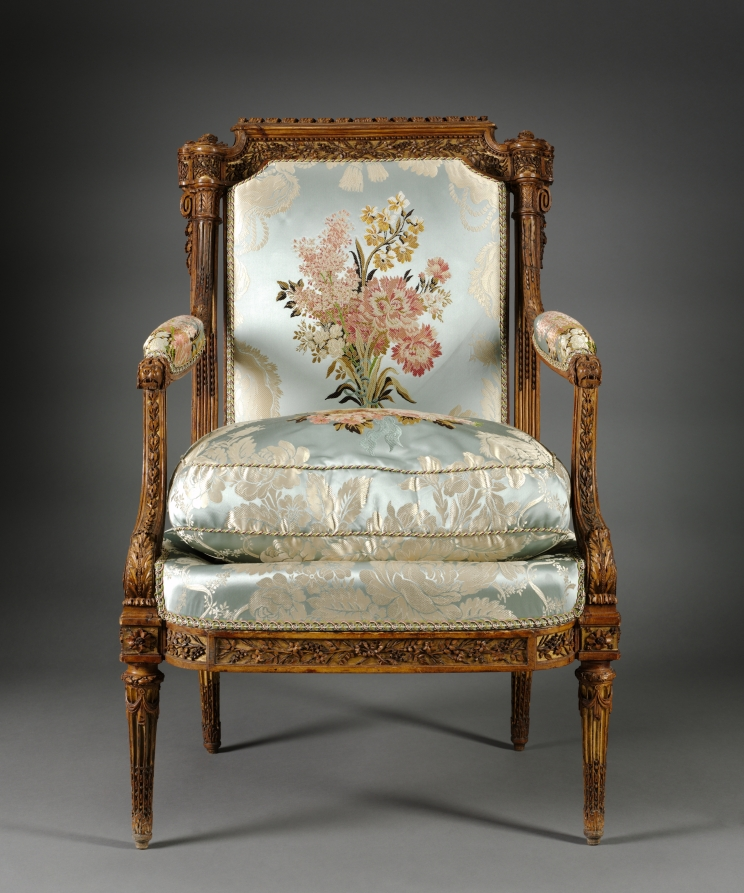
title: Armchair (Fauteuil) (2 of 2)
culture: France, 18th century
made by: Nicolas-Denis Delaisement (French)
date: c. 1785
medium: boxwood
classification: Furniture and woodwork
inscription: signed on front and back of frame of seat underneath: Delaisement with inverted "s."